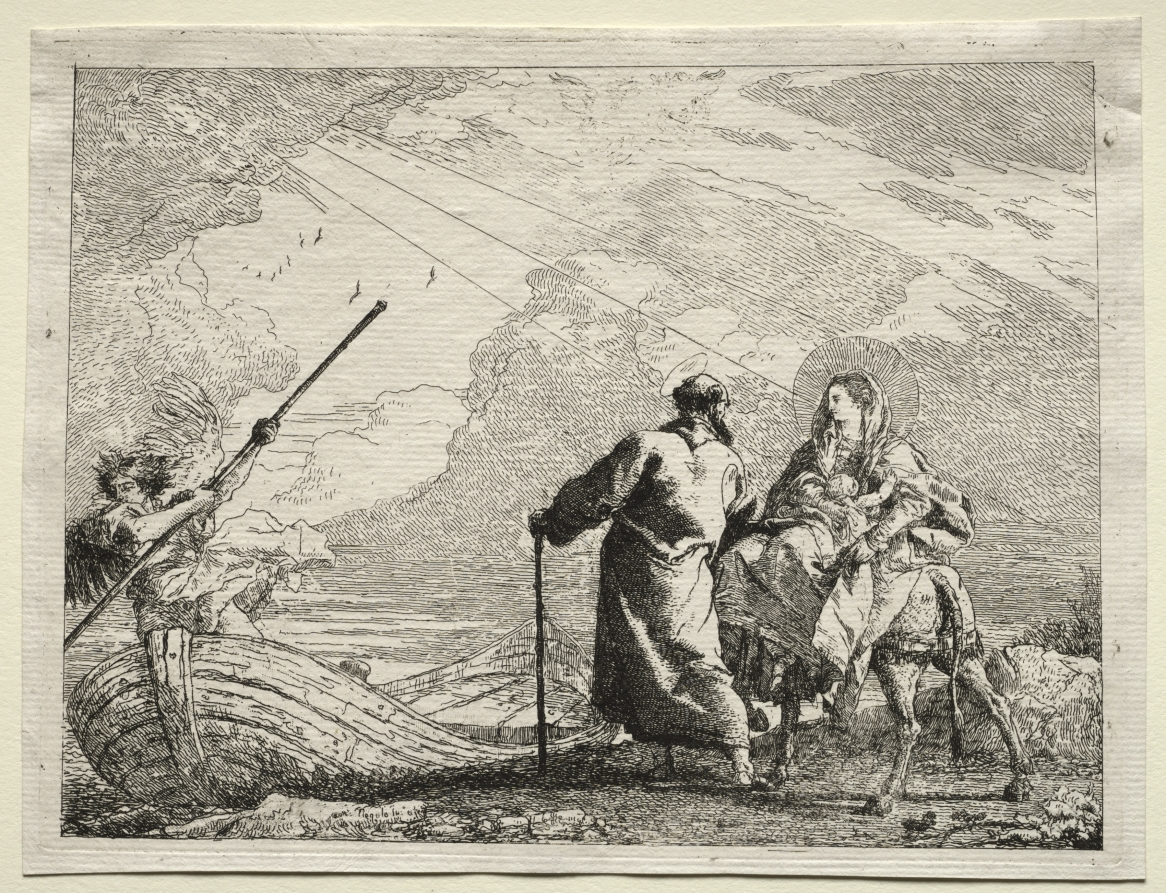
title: Flight into Egypt: The Holy Family Arriving at the Bank of the River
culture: Italy, 18th century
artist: Giovanni Domenico Tiepolo (Italian, 1727–1804)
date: 1750–53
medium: etching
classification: Print